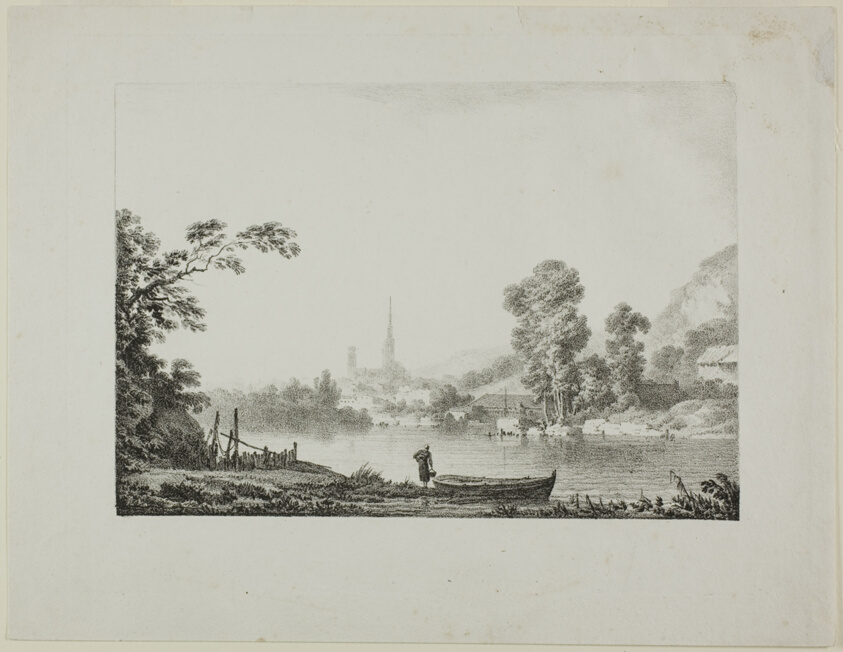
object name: Print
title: Study of a Landscape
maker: Louis-Jacques Daguerre (French, 1787-1851)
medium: Lithograph on paper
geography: France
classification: lithograph; print; prints and drawing